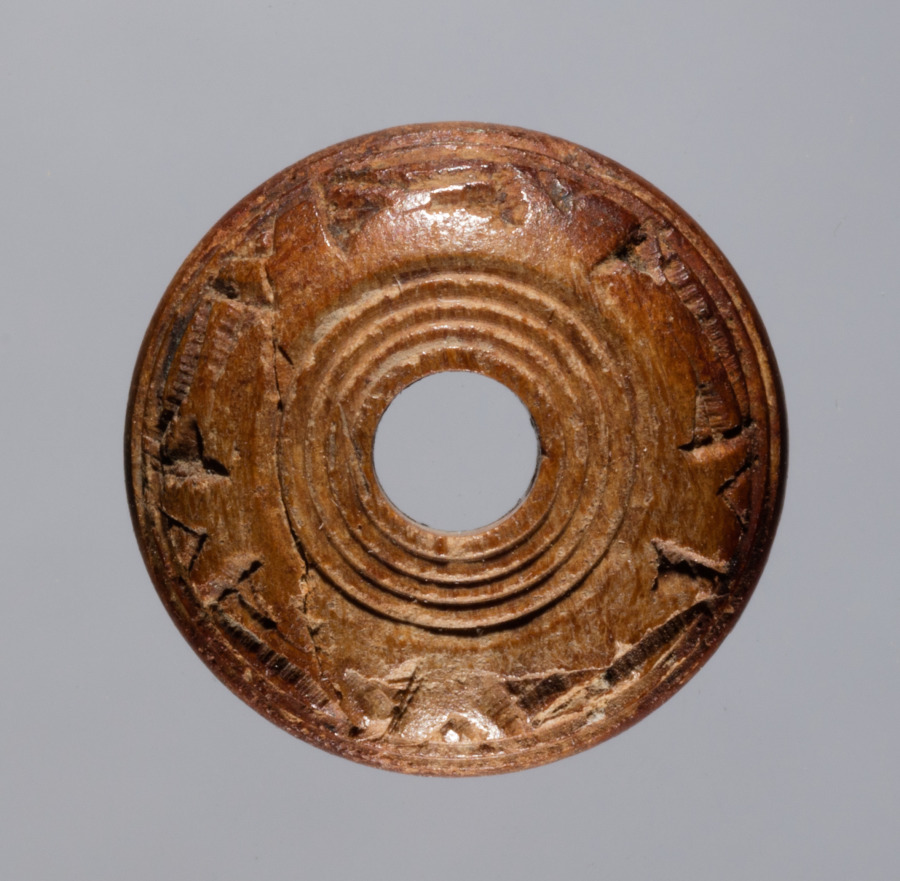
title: Spindle Whorl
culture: Iran, early Islamic period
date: 700s - 900s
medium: bone, incised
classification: Spindle Whorl